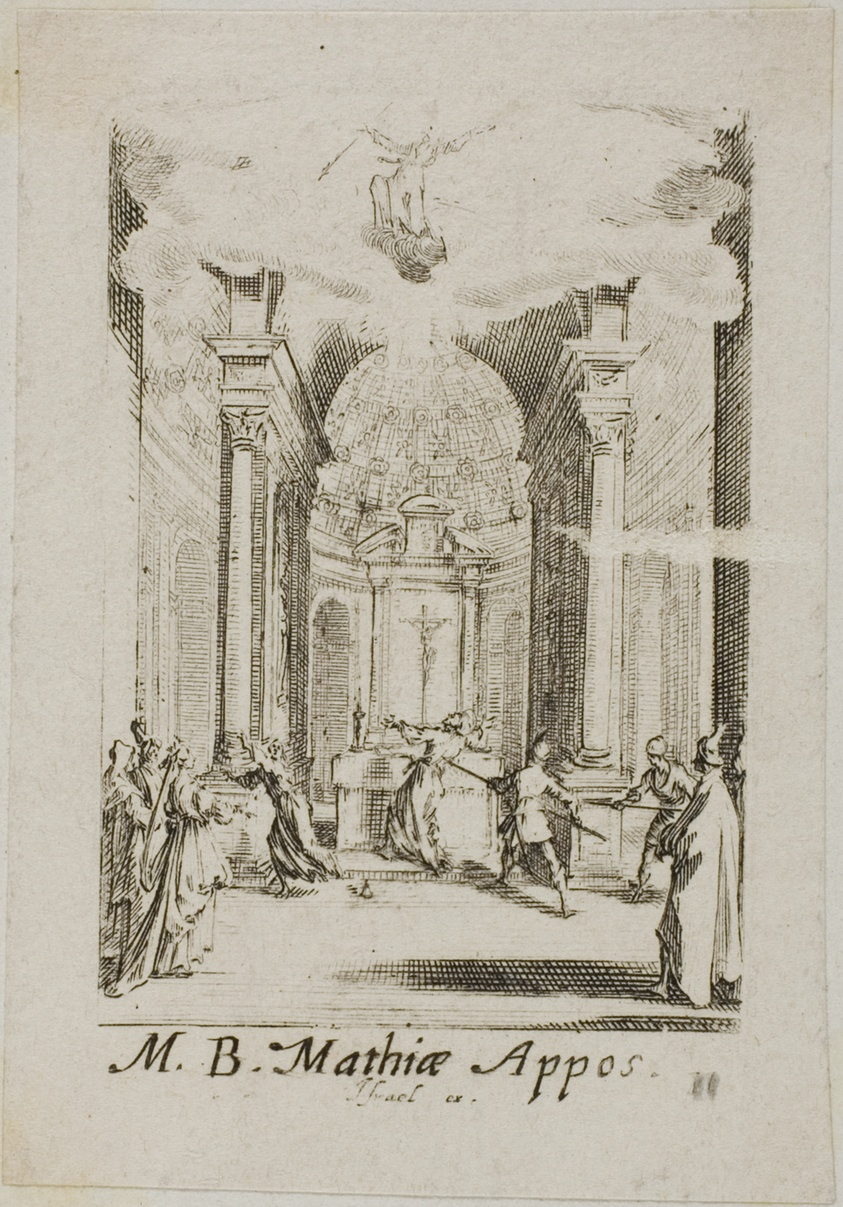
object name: Print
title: Martyrdom of Saint Mathias, plate eleven from The Martyrdoms of the Apostles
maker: Jacques Callot (French, 1592-1635)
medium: Etching on paper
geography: France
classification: etching; print; prints and drawing